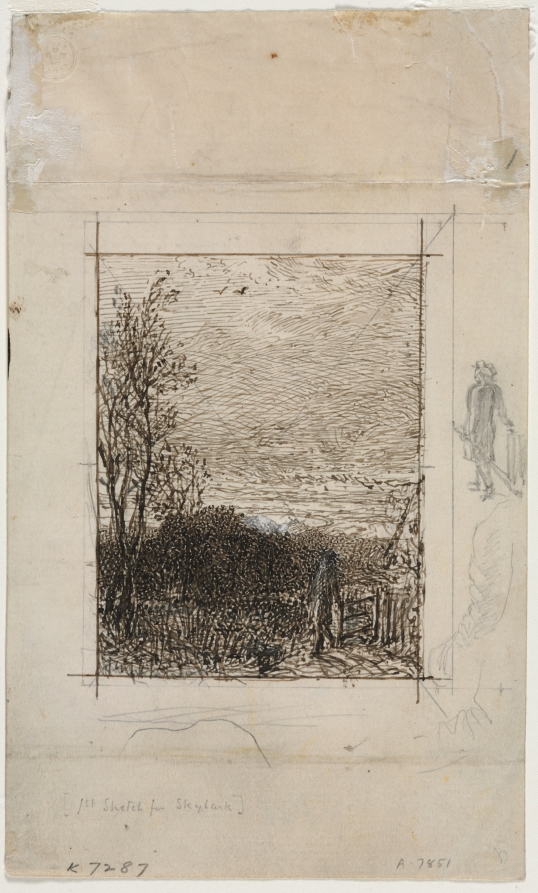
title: The Skylark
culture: England, 19th century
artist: Samuel Palmer (British, 1805–1881)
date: c. 1850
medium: pen and ink over graphite with white heightening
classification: Drawing